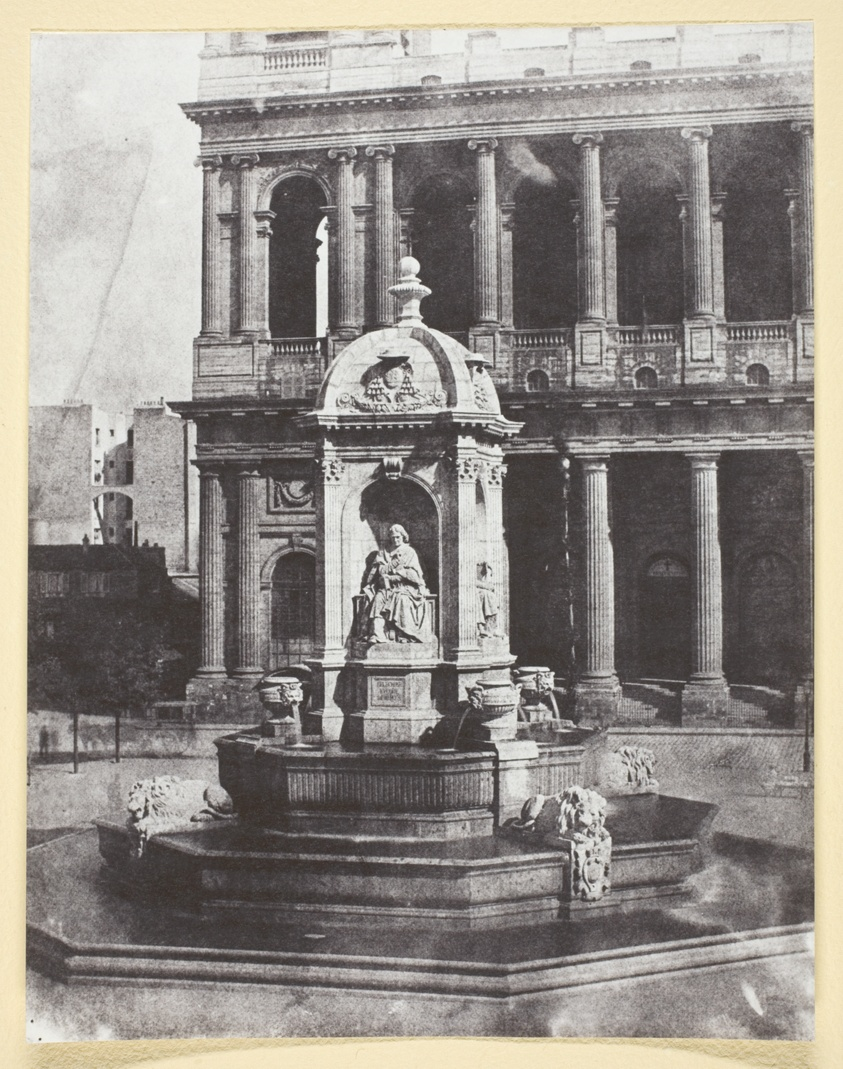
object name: Photograph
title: Place Saint-Sulpice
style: 19th century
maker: Hippolyte Bayard (French, 1801–1887)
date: 1842/50, printed 1965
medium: Gelatin silver print, No. 17 from the portfolio "Bayard: XXV Calotypes, 1842-1850" (1965)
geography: France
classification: photographic process; photography; photograph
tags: Collected by Hugh Edwards